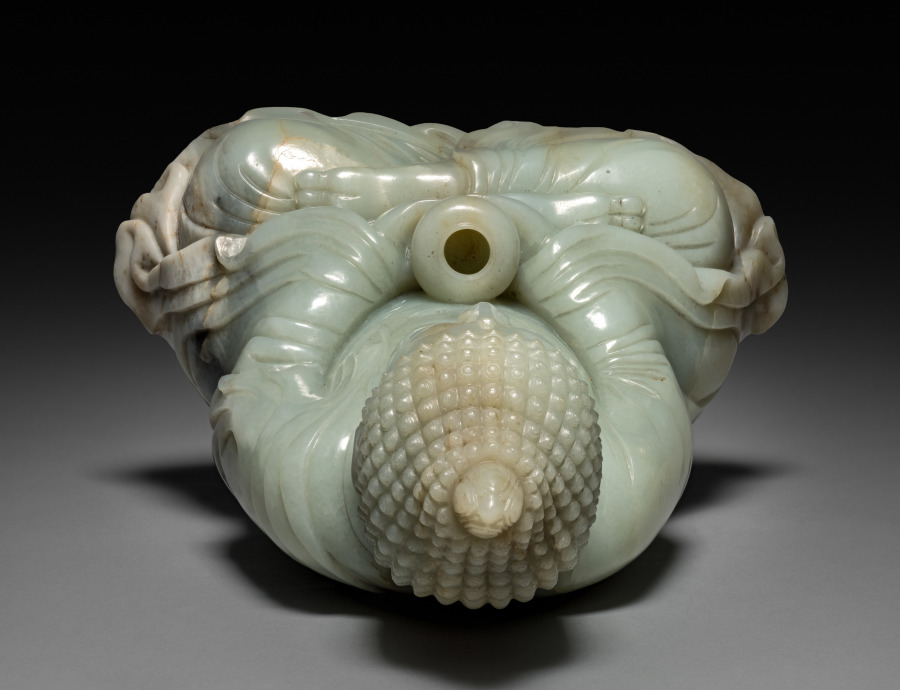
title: Seated Buddha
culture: China, Qing dynasty (1644-1911)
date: 1700s–1800s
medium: jade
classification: Jade